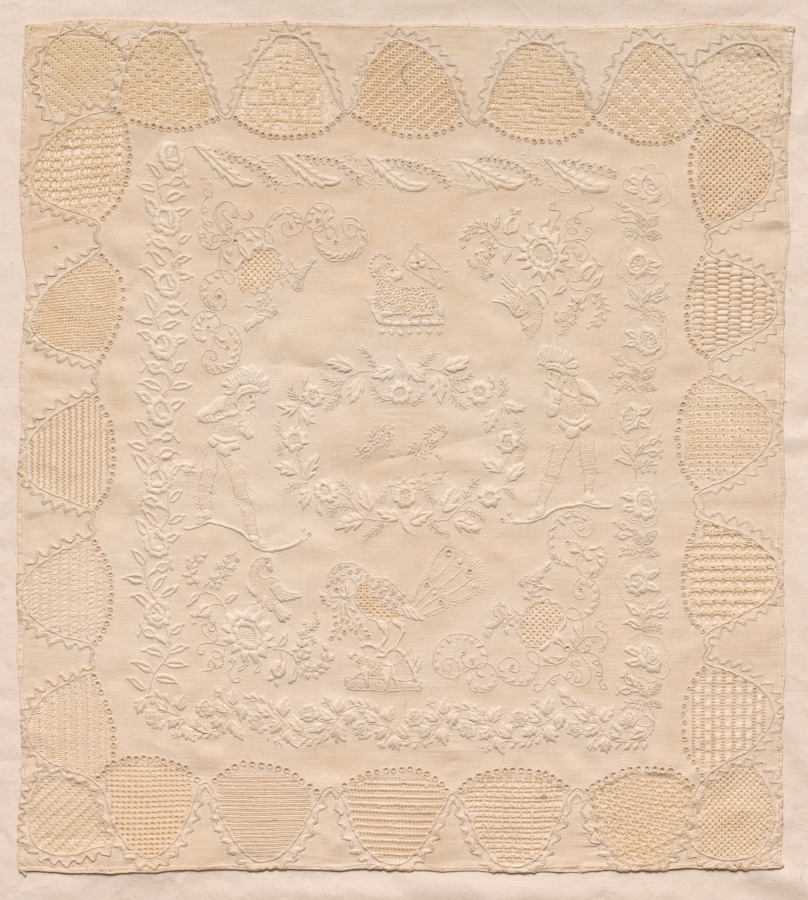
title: Sampler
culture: Mexico, 19th century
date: 1800s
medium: embroidery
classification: Sampler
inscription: in center, a wreath with initials "P G."